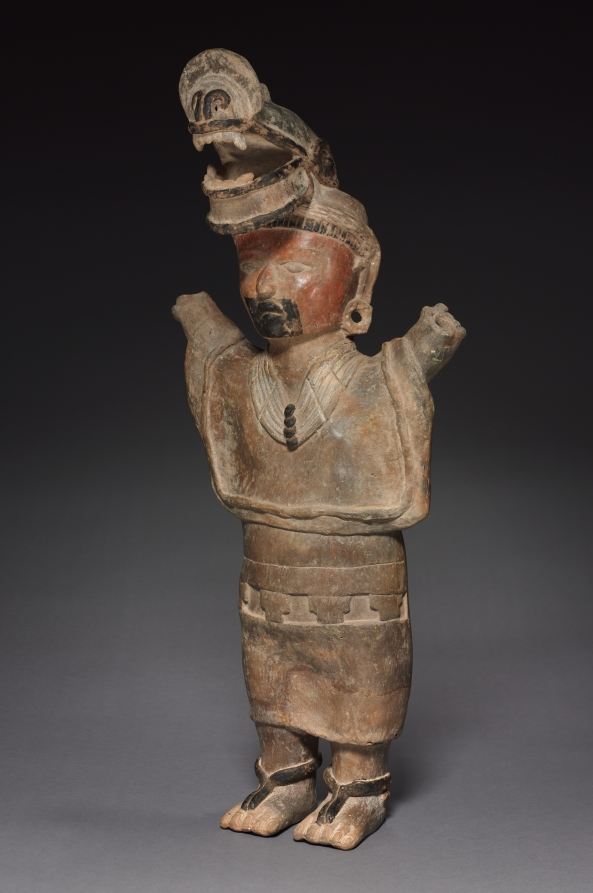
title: Standing Female Figure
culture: Mexico, Veracruz, Veracruz Monumental Sculpture type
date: 600–900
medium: burnished pottery with orange slip, traces of red and white pigment, and asphalt paint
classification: Sculpture